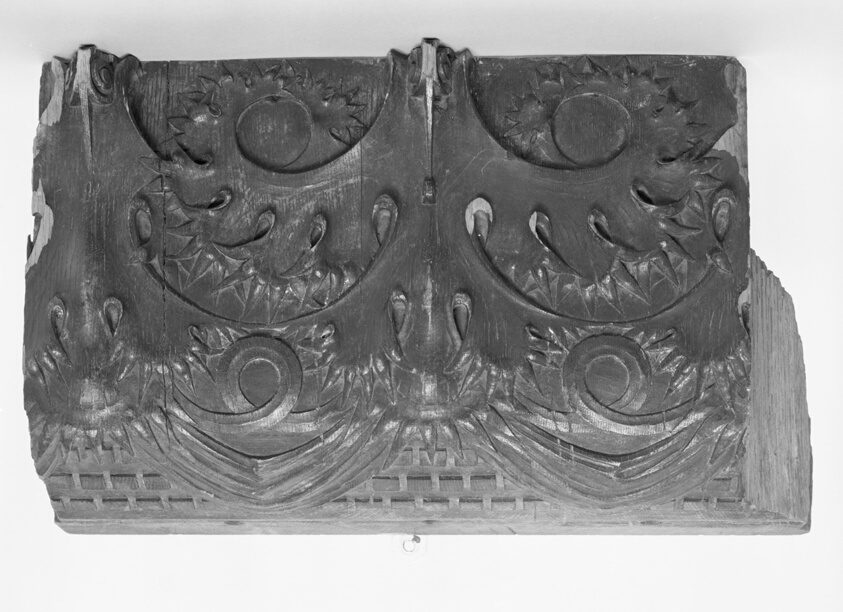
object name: Architectural fragment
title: Auditorium Building: Section of the Hotel Bar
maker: Architects: Adler & Sullivan, (American, 1883-1895); Designer: Louis H. Sullivan (American, 1856-1924)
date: 1887/89 (demolished c. 1941)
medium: Carved oak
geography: United States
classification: architectural fragment; architecture